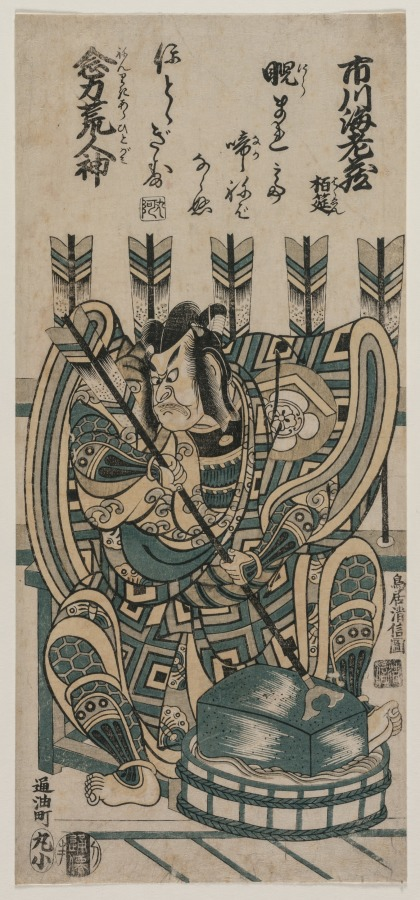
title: Ichikawa Ebizo III as Yanone Goro in Nenriki arahitogami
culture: Japan, Edo period (1615–1868)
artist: Torii Kiyonobu II (Japanese, 1706–1763)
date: 1758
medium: color woodblock print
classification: Print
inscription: Signature: Torii Kiyonobu zu Artist Seal: Kiyonobu Publisher: Maruya Kohei (Maruko, Toriaburacho) Engraver: Tsusen kan ?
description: Yanone (The Arrowhead) was one of the most famous plays in the Ichikawa Danjuro family repertoire. Goro, the hero of the play, sharpens arrowheads as a friend comes to wish him a happy New Year. Corny jokes and the sight of Goro in flamboyant clothing made the play very popular.